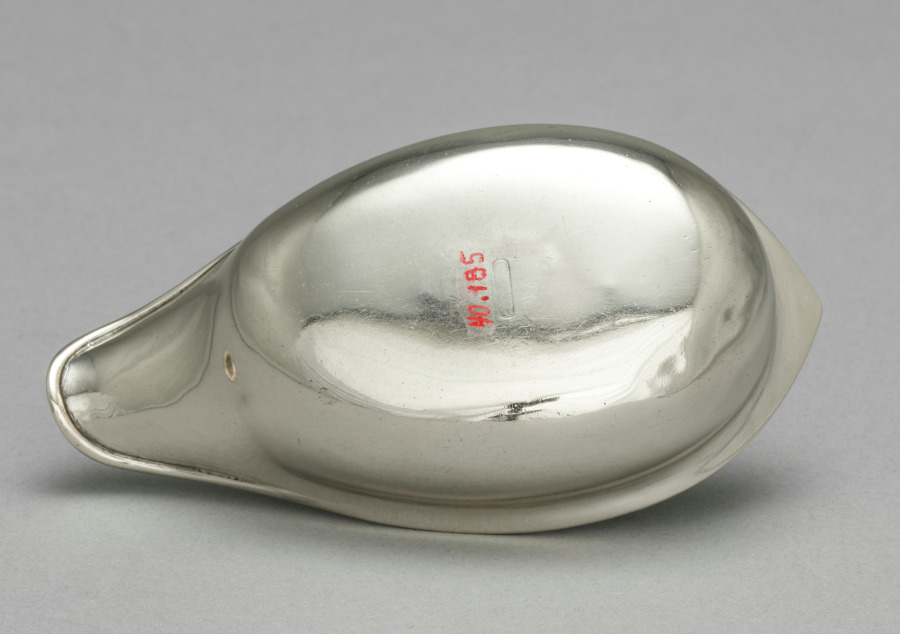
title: Pap Boat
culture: America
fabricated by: Cary Dunn (American, 1798)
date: c. 1790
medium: silver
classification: Silver